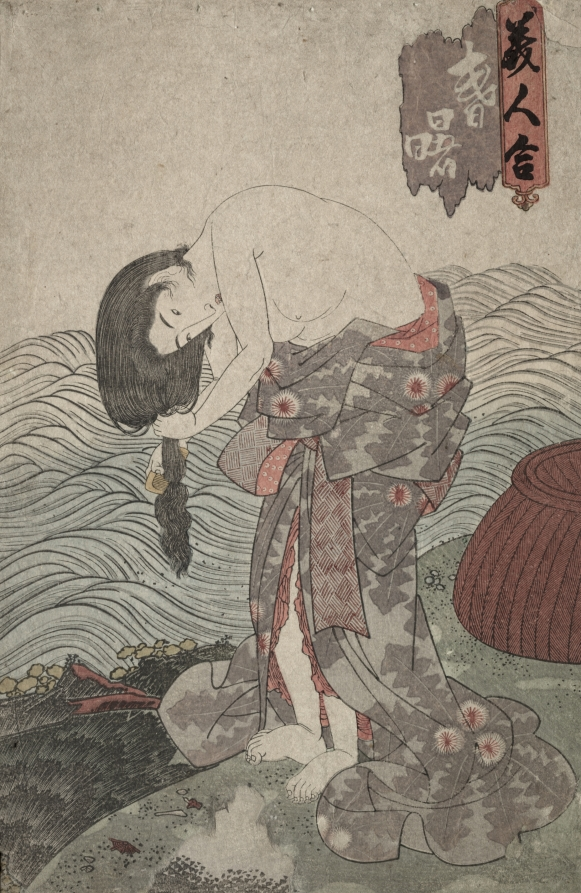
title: Woman Diver Combing her Hair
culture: Japan, Edo period (1615–1868)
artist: Utagawa Kunisada (Japanese, 1786–1865)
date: 1786–1864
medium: color woodblock print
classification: Print